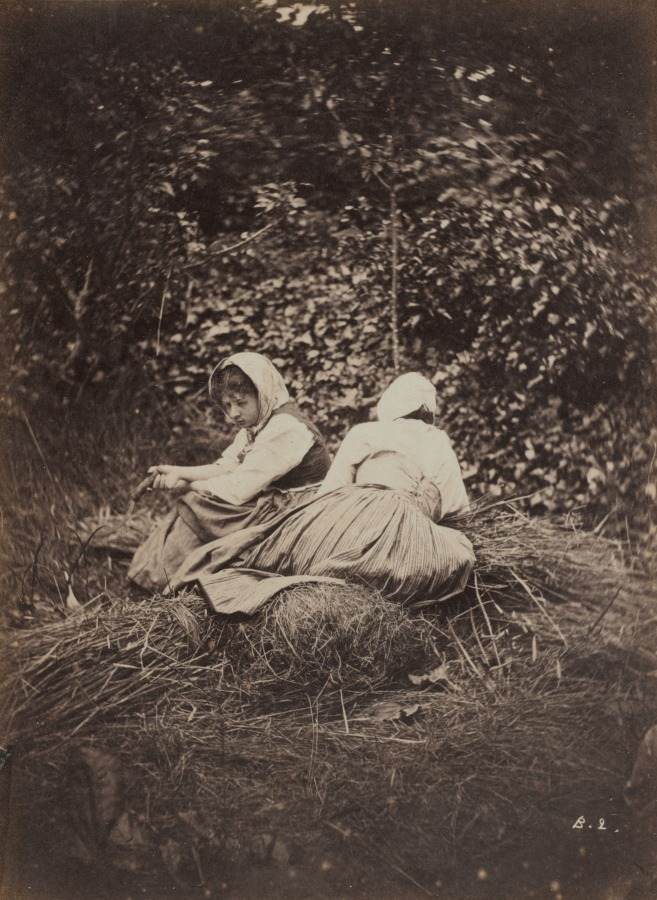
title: Two Peasant Girls Seated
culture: France, 19th century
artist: Auguste Giraudon's Artist (French)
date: 1870s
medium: glass negative and albumen print from wet collodion negative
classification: Photograph